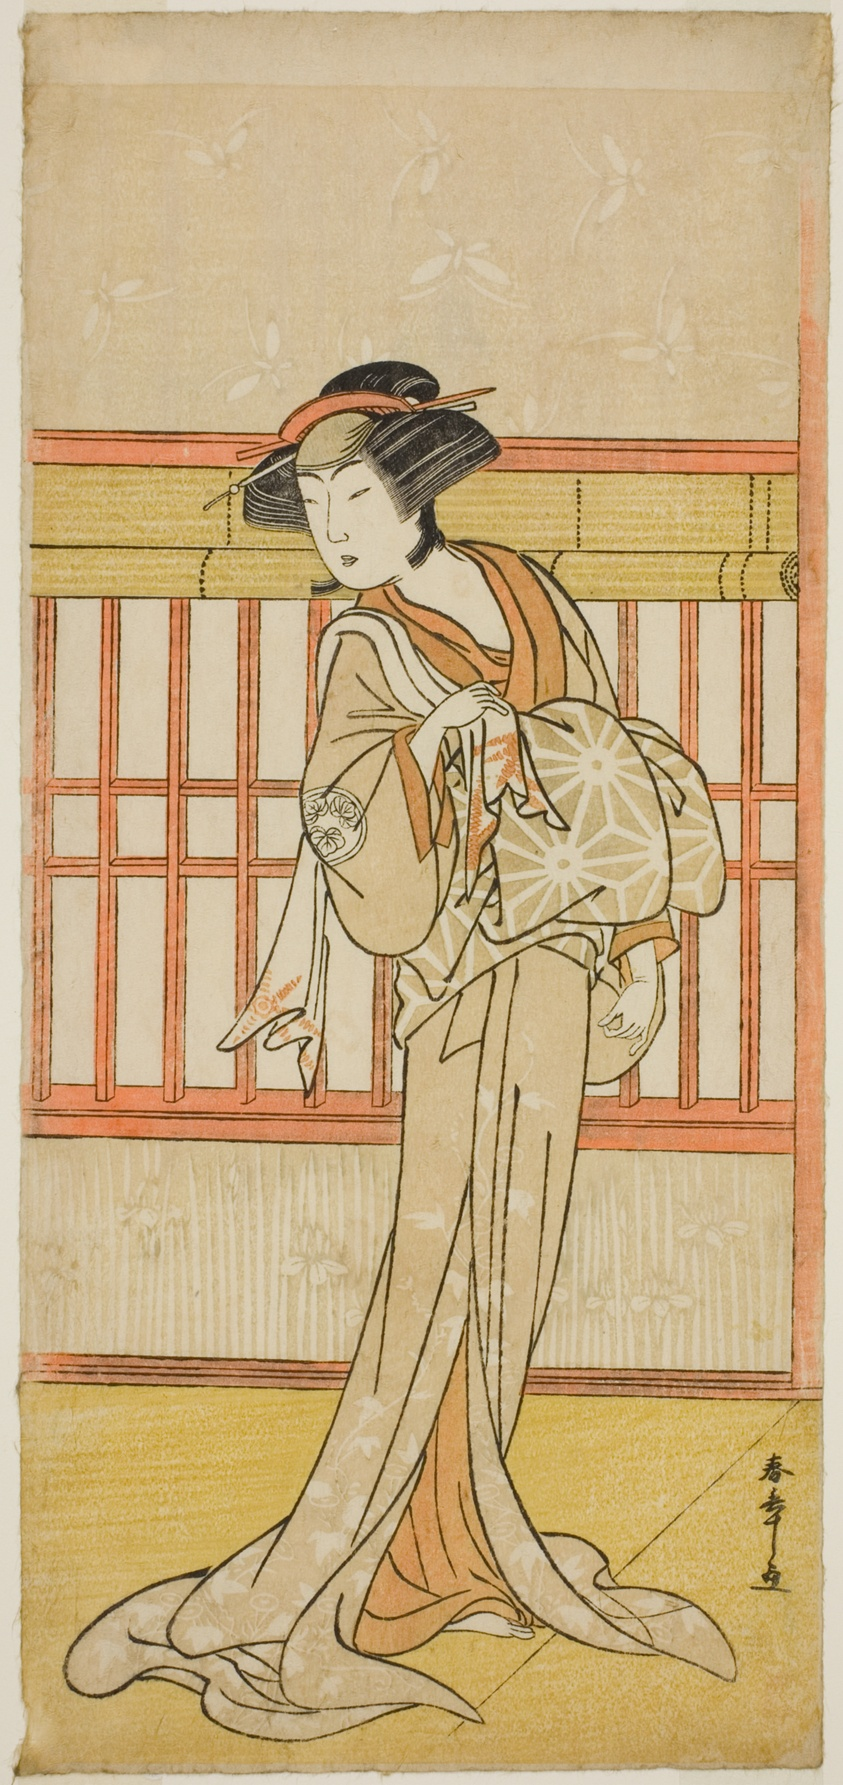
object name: Print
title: The Actor Osagawa Tsuneyo II as the Courtesan Miyagino (?) in the Play Go Taiheiki Shiraishi-banashi (?), Performed at the Morita Theater in the Fourth Month, 1780 (?)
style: Japanese (culture or style)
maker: Katsukawa Shunsho 勝川 春章; Japanese, 1726-1792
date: c. 1780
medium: Color woodblock print; hosoban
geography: Japan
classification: woodblock print; print; asian art